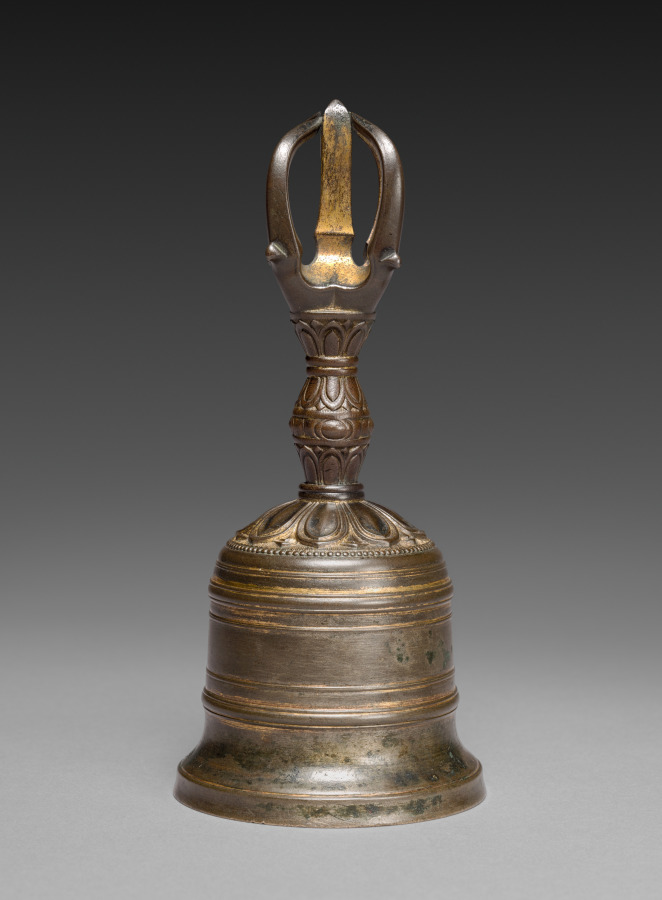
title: Five-pronged Vajra Bell (Gokorei)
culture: Japan, Kamakura period (1185–1333)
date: early 1300s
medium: gilt bronze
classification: Metalwork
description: The five prongs of this bell symbolize the Buddhist “Five Perfections”—generosity, morality, patience, perseverance, and concentration. The mouth of the bell symbolizes the “Sixth Perfection” of wisdom. The bell was used in Japanese Esoteric Buddhist rituals along with vajra pestles, or kongōsho.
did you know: Vajras are symbolic weapons, representing the properties of a diamond (indestructibility) and a thunderbolt (irresistible force), still used in Buddhist ceremonies today.